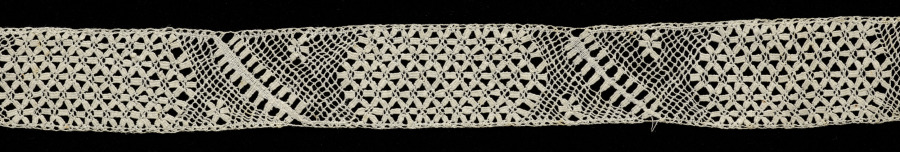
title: Lace Insertion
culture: Malta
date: 1700s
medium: Bobbin lace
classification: Lace